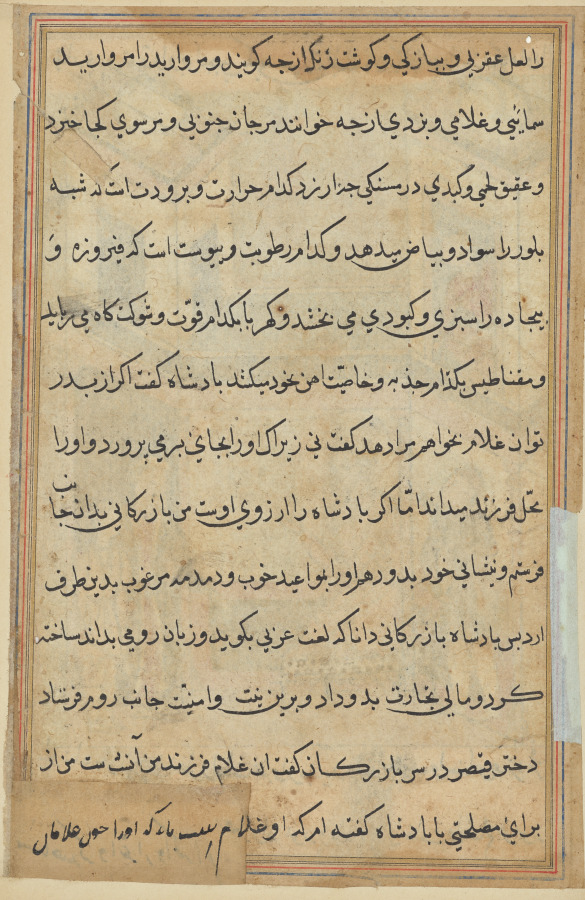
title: Page from Tales of a Parrot (Tuti-nama): text page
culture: Mughal India, court of Akbar (reigned 1556–1605)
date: c. 1560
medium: gum tempera, ink, and gold on paper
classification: Painting